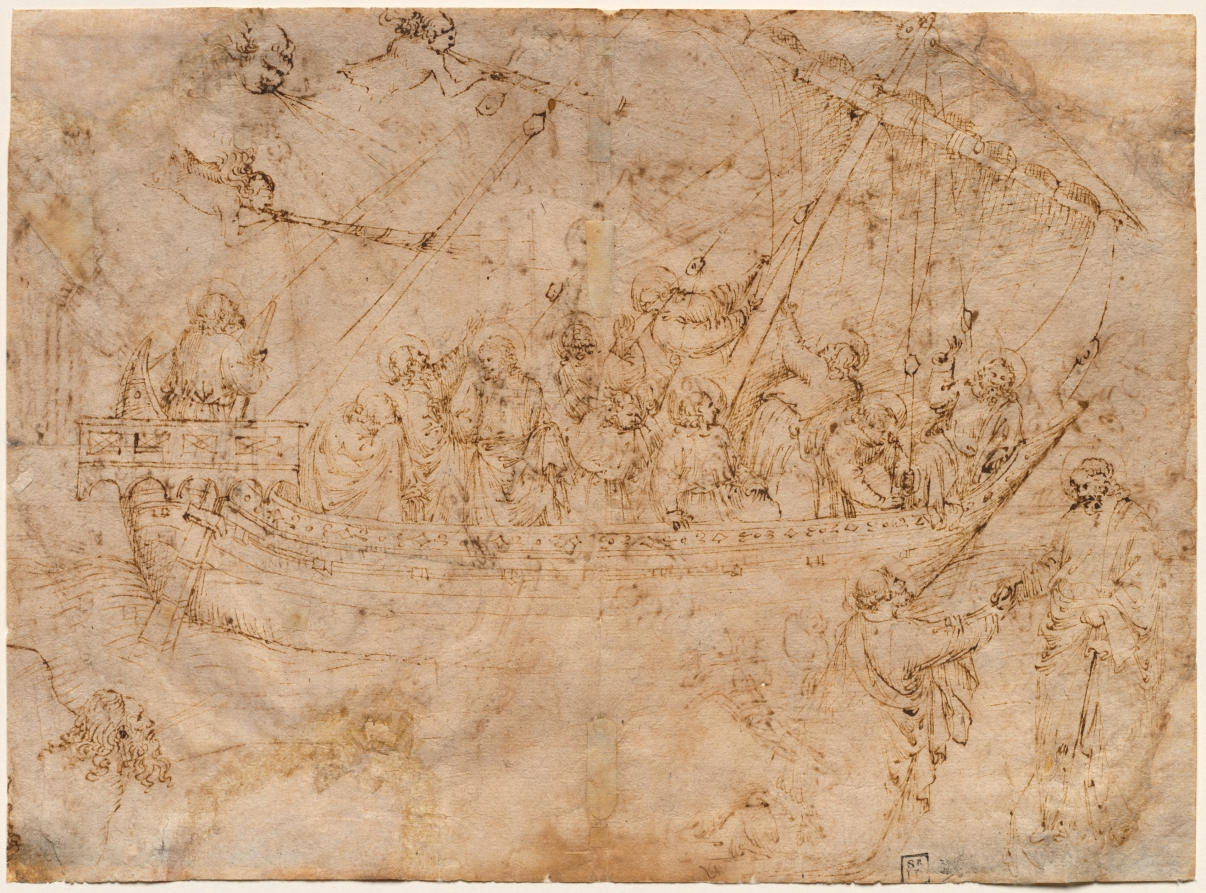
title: Navicella (recto)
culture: Italy, Arezzo, 15th century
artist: Parri Spinelli (Italian, 1387–c. 1453)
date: c. 1410s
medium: pen and brown ink (iron gall)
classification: Drawing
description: Parri Spinelli was most important painter from Arezzo in the early 1300s. About 30 of his drawings are extant, more than for any other artist of the period, when drawing was just beginning to be common to artistic practice. Spinelli used a quill pen and ink on a large sheet of paper to copy the composition of a monumental mosaic by the Florentine artist Giotto that adorned the portico of Old Saint Peter’s Basilica in Rome (since destroyed). In this scene from the Bible, Christ walks on water at right, while Saint Peter kneels before him in front of a ship filled with Christ’s disciples. Spinelli focused on the outlines of the figures, using a limited vocabulary of parallel and perpendicular lines to suggest shallow depth and shadow. Paper was rarely wasted. On the other side of the sheet (1961.38.b), Spinelli continued the copy, rendering two large ships and two rowing boats full of people.The drawing formed part of a model or pattern book that Spinelli would have kept in his studio. The book was broken up, probably as early as the 1500s, and two other drawings with the same subject—in the Metropolitan Museum of Art, New York, and in the Musée Bonnat in Bayonne—are known.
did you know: Dating from the early 1400s, this drawing by Parri Spinelli is the oldest in the Cleveland Museum of Art's collection.